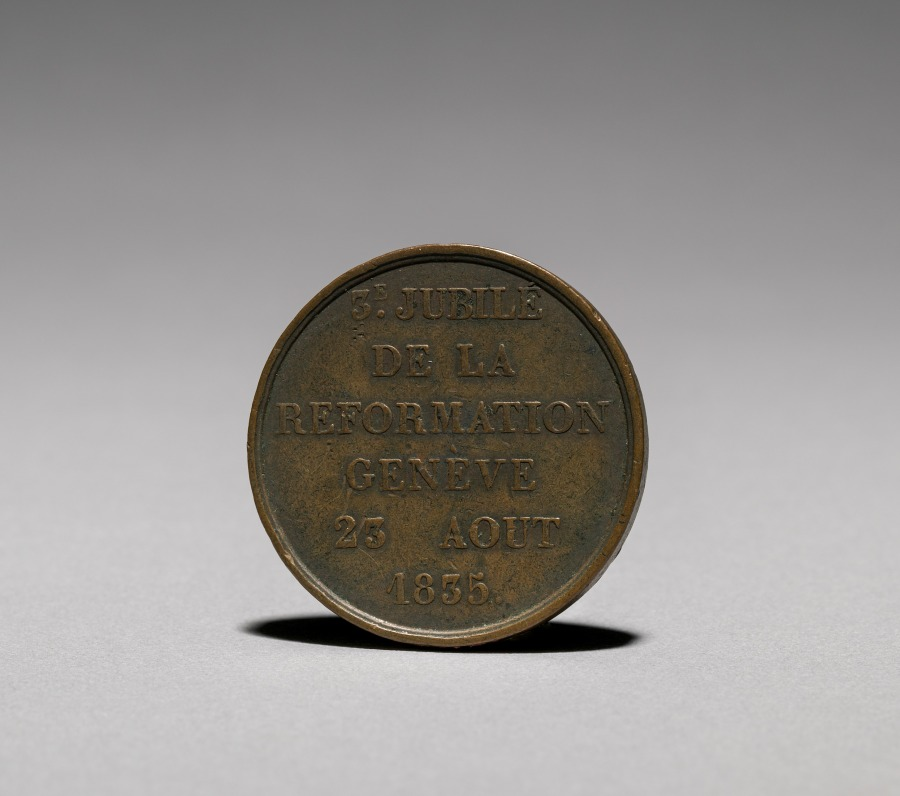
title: Medal: Commemorating 3c Jubilé de la Reformation Genève 23 Aôut 1835 (reverse)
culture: France ? or Switzerland ?, 19th century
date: 1835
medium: bronze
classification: Metalwork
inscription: 3c jubile de la reformation Genève 23 Aout 1835.